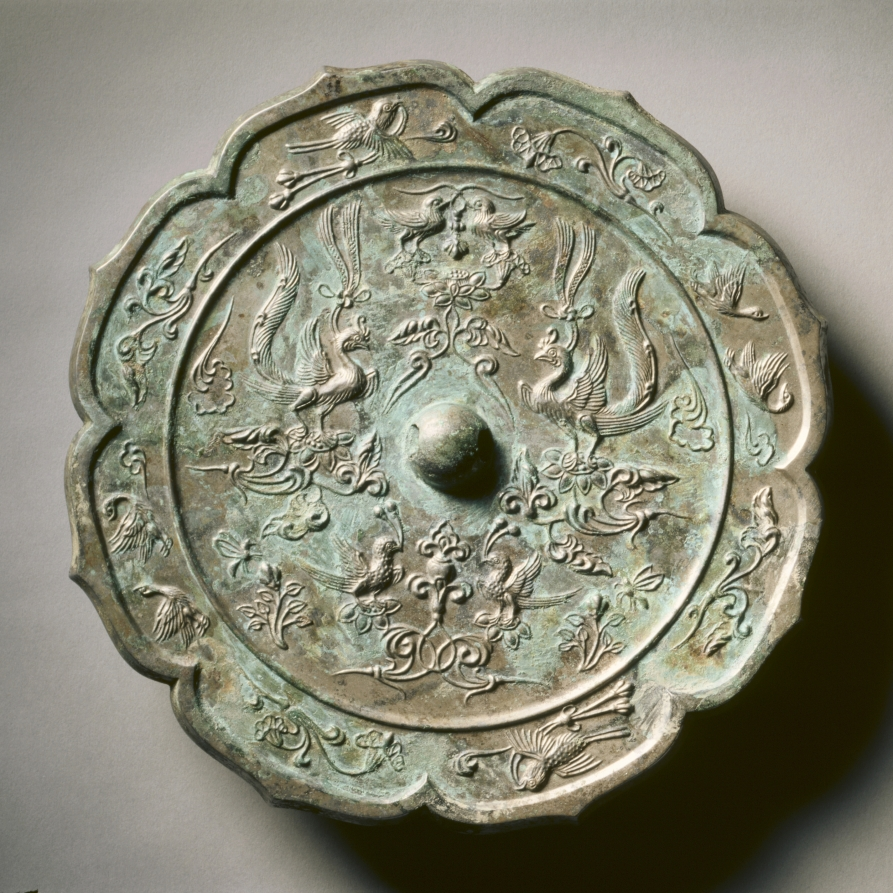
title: Octafoil Mirror with Paired Phoenixes, Birds, and Flowers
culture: China, Tang dynasty (618-907)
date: late 700s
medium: bronze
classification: Metalwork